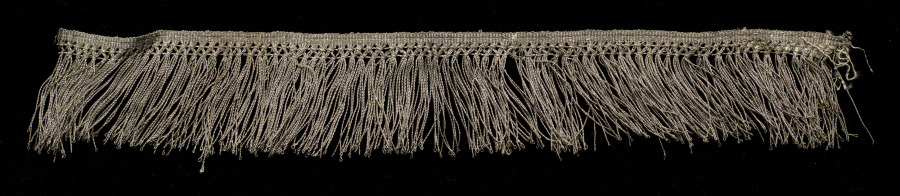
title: Lace Fringe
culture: Russia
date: 1800s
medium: Silver metal thread: bobbin lace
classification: Lace